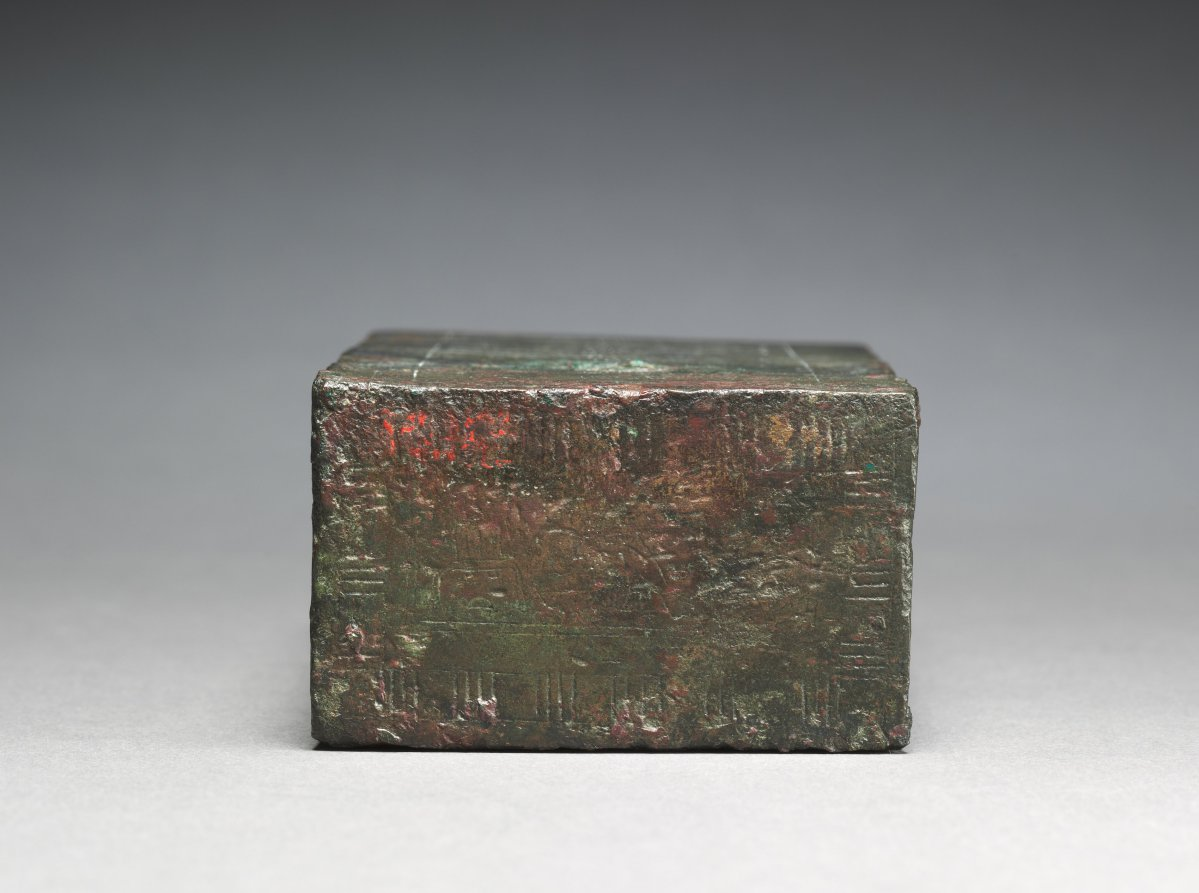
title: Statue Base Dedicated to Amen-Ra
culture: Egypt, Late period (715–332 BCE), Dynasty 26 or later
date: 664–525 BCE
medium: bronze, hollow cast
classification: Sculpture